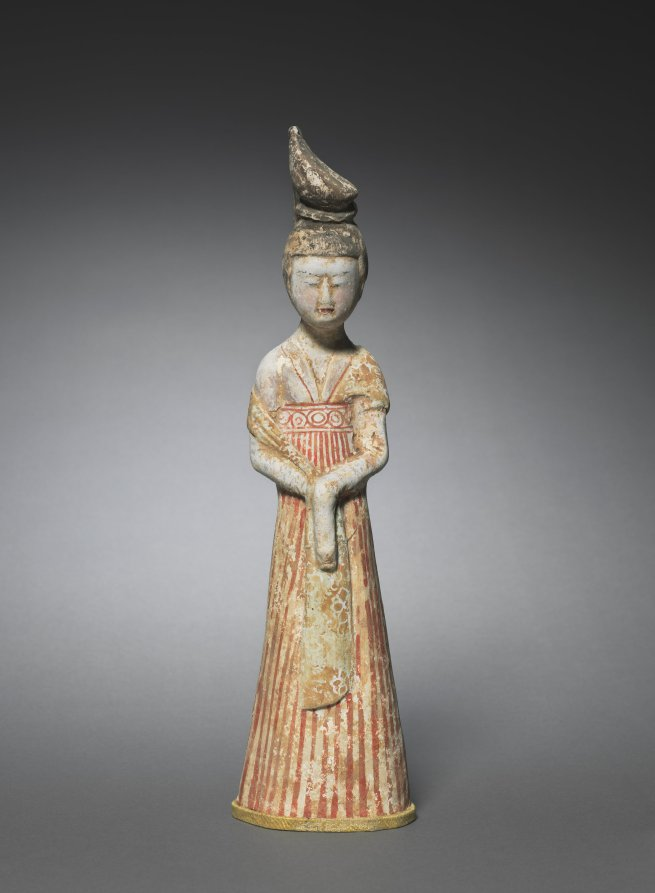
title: Court Lady with High Chignon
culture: North China, Tang dynasty (618-907)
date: c. 700–750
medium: earthenware with polychromy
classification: Sculpture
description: Tang figurines placed in the tombs give a vivid picture of everyday life. Images of elegant ladies in various hairstyles, costumes, and activities suggest the fashion of the time. This slender court woman's clasped hands are covered by long, narrow sleeves. Her v-neck blouse is tucked into a floor-length skirt with empire waistband. A long stole drawn from the bodice and across the back falls between her wrists. Her skirt is painted with thin red stripes, the waistband with double red circles, and the stole with white rosettes in unfired pigments. Her black hair is piled into high angled chignon. Together with other figurines—court officials, musicians, dancers, hunters, foreign travelers, horses, camels, guardian warriors, and guardian animals—such tomb sculptures accompanied the deceased in the afterlife.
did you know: Tang aristocratic women had a high degree of freedom, especially in contrast with the Neo-Confucianism of the later Song dynasty.